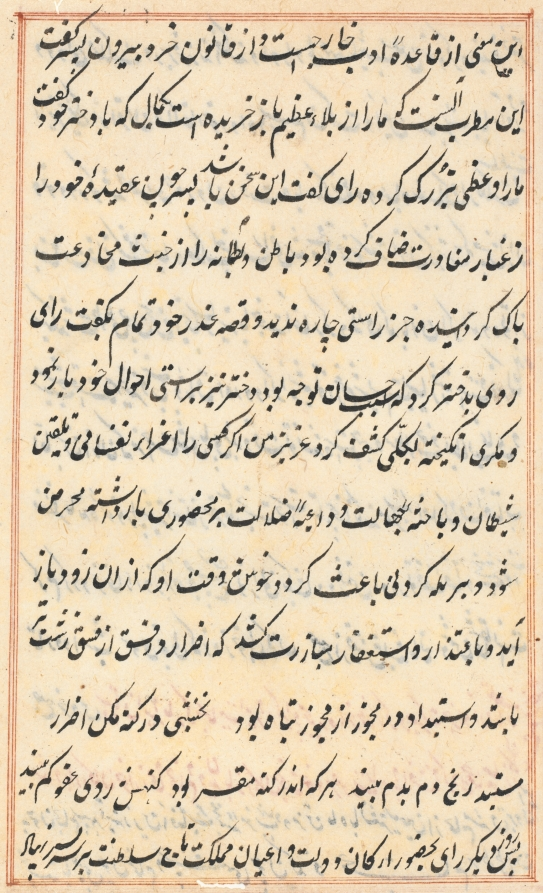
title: Page from Tales of a Parrot (Tuti-nama): text page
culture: Mughal India, court of Akbar (reigned 1556–1605)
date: c. 1560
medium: gum tempera, ink, and gold on paper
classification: Painting